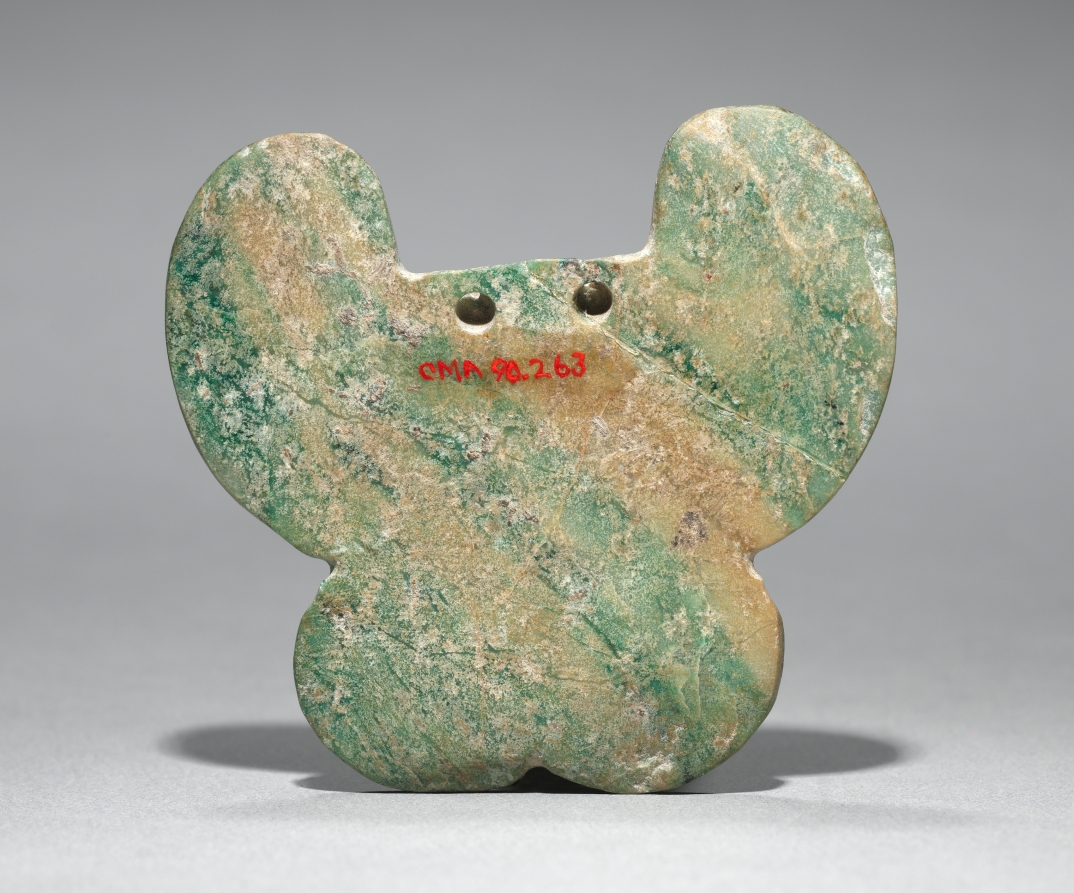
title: Butterfly Nose Ornament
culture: Central Mexico, Teotihuacán, Classic period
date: 150–200 CE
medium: jadeite-albitite?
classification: Stone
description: Near Teotihuacán’s largest palace is a temple ornamented with green-feathered serpents, symbols of the earth’s fertility. Beneath the temple were at least 120 human sacrifices, most men, many warriors, and some wearing greenstone ornaments like these, perhaps a set. The sacrifices may have consecrated the temple or a ruler’s tomb, or both.